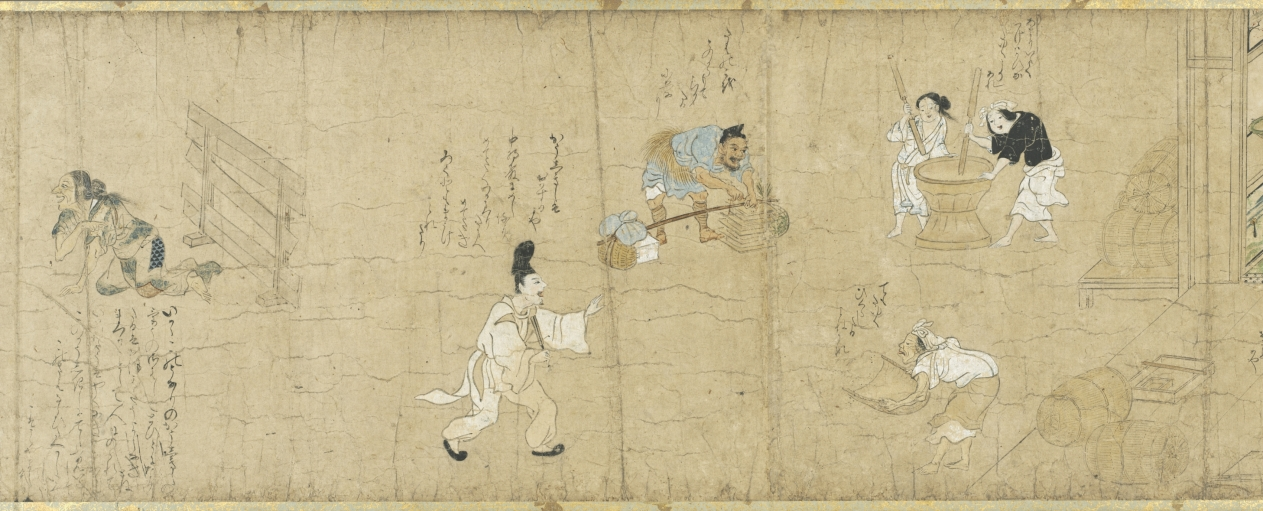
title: The Story of Fukutomi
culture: Japan, Muromachi period (1392–1573)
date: mid-1400s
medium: Handscroll; ink and color on paper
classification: Painting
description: This handscroll shows the second half of an odd tale in which a ne’er-do-well seeks the path to quick fortune and learns the art of musical flatulence. Prior to a major performance, a mentor (and competitor) advises him to consume morning glory seeds, a laxative. Thus, while performing he fouls himself and ends his days in humiliation. The audacious nature of this story and its presentation—well-animated figures with dialogue adjacent to the appropriate moments of action—create a primitive graphic novel. Japanese visual humor about farting preceded this story, but the satirical, mean-spirited twist in this tale suggests its intent was not merely to be humorous. The story was likely commissioned by court officials who disapproved of common performers rising to high positions, outflanking what was the accepted social order.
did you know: This scroll is treasured as the second oldest surviving version of this story.